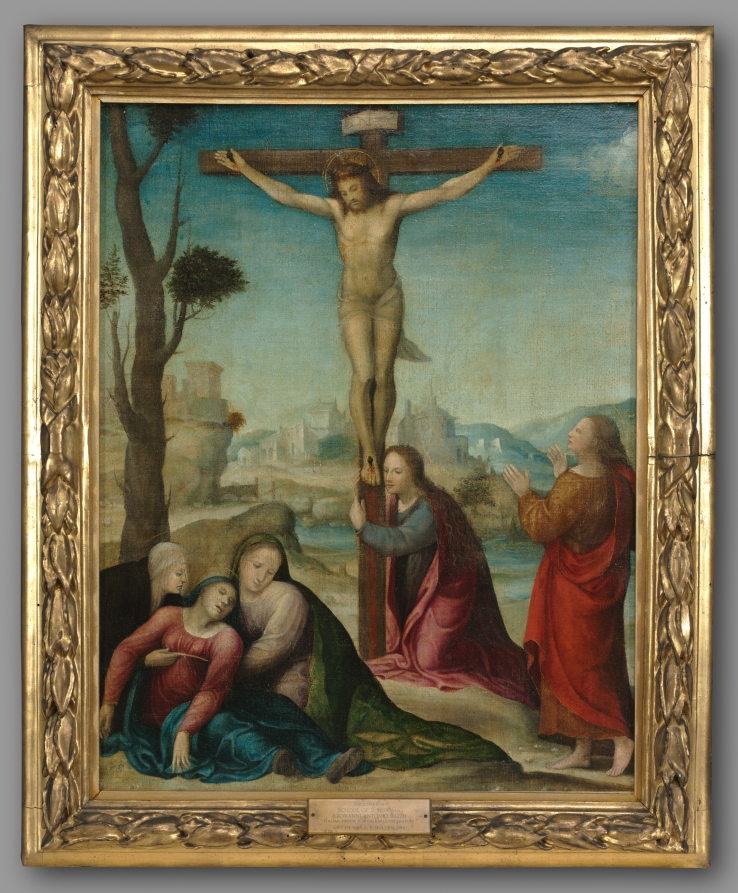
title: The Crucifixion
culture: Italy, 16th century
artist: follower of Sodoma (Italian, 1477–1549)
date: 16th century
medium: oil on canvas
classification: Painting